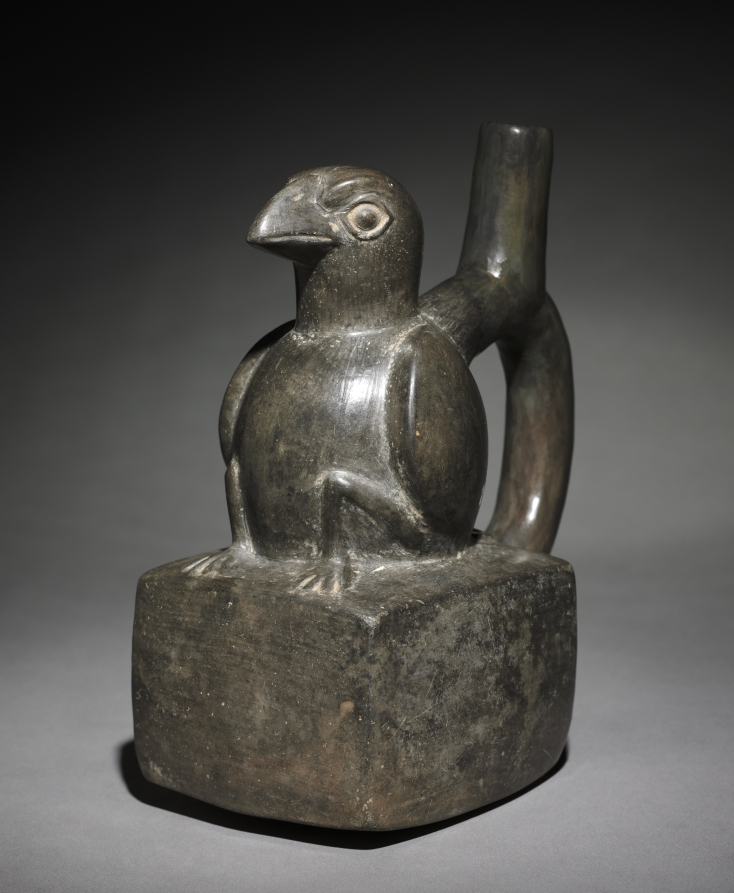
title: Darkware Vessel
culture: Peru, North Coast, Chimú style (900-1470)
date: 900–1470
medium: black ware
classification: Ceramic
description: Under the Chimú, ceramic seems to have been a less important artistic medium than for earlier north coast cultures. Accordingly, ceramics were mass produced with molds and, rather than bearing painted scenes, often have an overall dark surface achieved by firing in a smoky atmosphere.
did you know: Chimú potters fired their vessels in a reduced-oxygen atmosphere to achieve a uniform black surface.